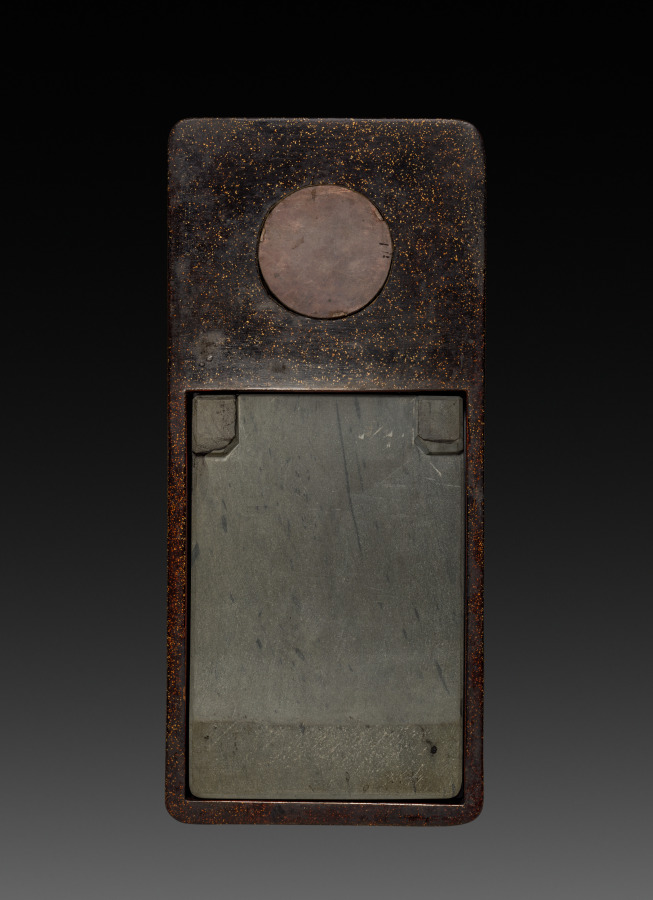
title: Writing Box (Suzuribako) with Phoenix in Paulownia (inkstone and water dropper)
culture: Japan, Momoyama period (1573–1615)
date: c. 1573–99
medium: Lacquer on wood with sprinkled gold and silver powder (maki-e) and gold and silver foil application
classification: Lacquer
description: The only place the mythical phoenix will perch is in the paulownia tree. Along with the dragon, the bird is a symbol of imperial power in East Asia. This box––a container for an inkstone, brushes, and ink––is both functional and lavish, its dramatic effects achieved with a pear-skin ground decoration (nashiji) and sprinkled powder decoration in high relief (takamaki-e).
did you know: The only place the mythical phoenix will perch is the paulownia tree.